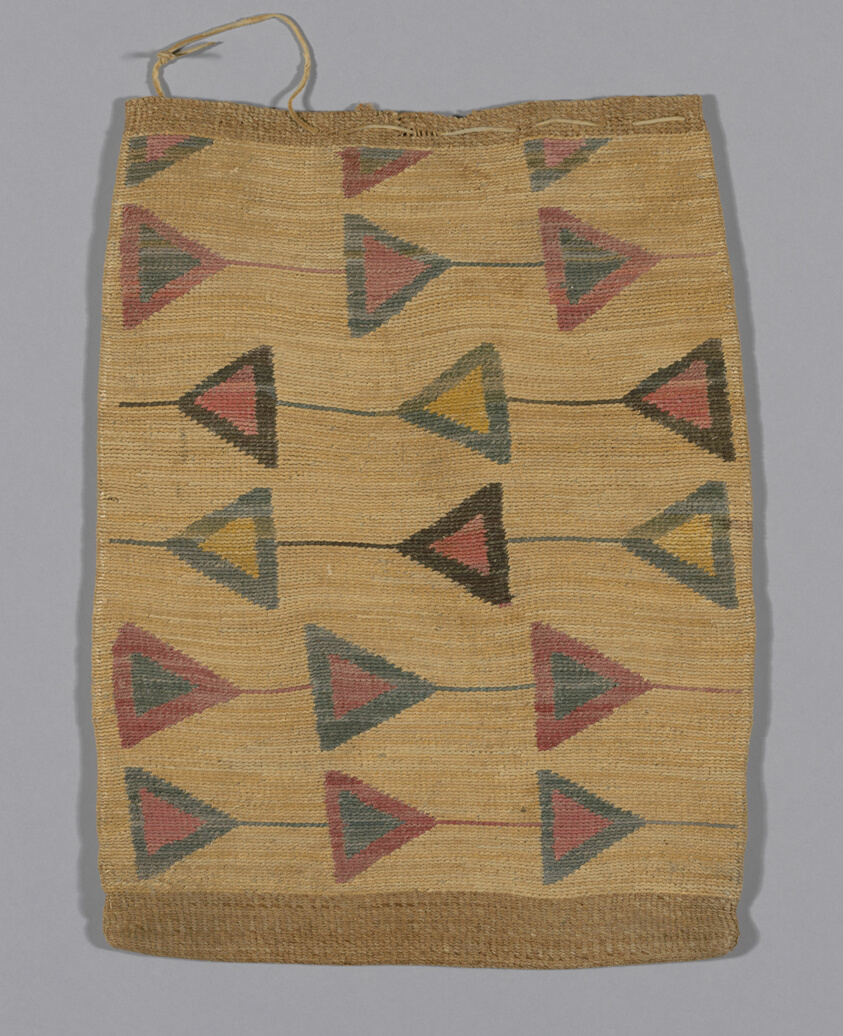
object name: Textile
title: ˀımáˀsp̉alx̣ (Flat Storage Bag)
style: native american, nez percé, nimiipuu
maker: Probably Nez Perce (Nimíipuu); Columbia Plateau, United States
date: c. 1860/80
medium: Bast fiber, two-strand weft-twining; with cornhusk supplementary weft-twining (false-embroidery); drawstring (possibly suede)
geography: Columbia Plateau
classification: textile; bag - weaving; needlework (visual works); weaving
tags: geometric